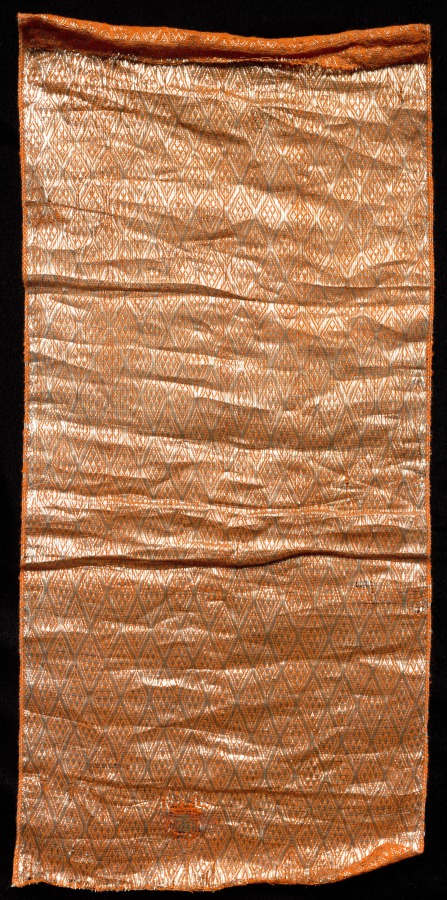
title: Piece of a Turban (Pugri)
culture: India, Chanderi, 19th century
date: 1800s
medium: cotton with metal woven in diamond design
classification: Textile